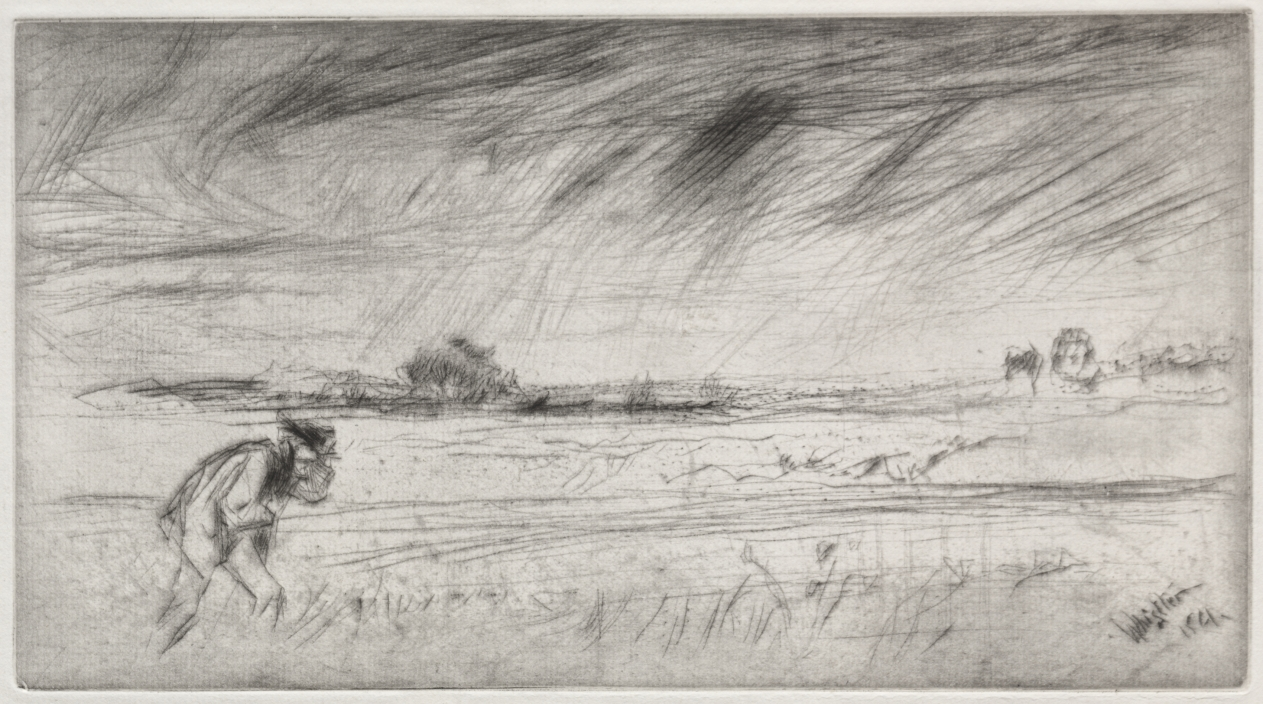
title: The Storm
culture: America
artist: James McNeill Whistler (American, 1834–1903)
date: 1861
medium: drypoint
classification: Print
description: During the summer of 1861, the artist Matthew White Ridley introduced Whistler to Edwin Edwards, a lawyer who had left his profession to devote himself to his avocations of art and music. Edwards used a covered boat for etching expeditions on the river---no doubt inspired by "le botin," the covered boat from which the Barbizon artist Charles Daubigny sketched the Seine (see The Boat in Conflans, elsewhere in the exhibition). In June 1861, despite persistent rain, Edwards invited Ridley and Whistler to take the boat on a camping trip to Maple Durham. On this voyage, Whistler made several drypoints, including The Storm, in which Ridley battles against driving wind and rain with the river foaming in the background.